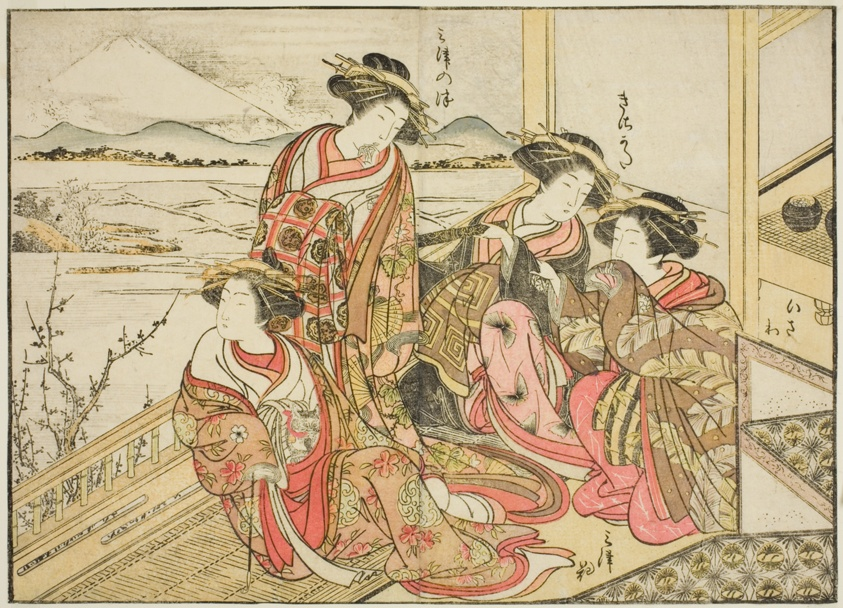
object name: Print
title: Courtesans of the Obishiya, from the book "Mirror of Beautiful Women of the Pleasure Quarters (Seiro bijin awase sugata kagami)," vol. 2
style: Japanese (culture or style)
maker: Katsukawa Shunsho; Japanese, 1726-1792; Kitao Shigemasa; Japanese, 1739-1820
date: 1776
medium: Color woodblock print; double-page illustration cut from a book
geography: Japan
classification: woodblock print; print; asian art